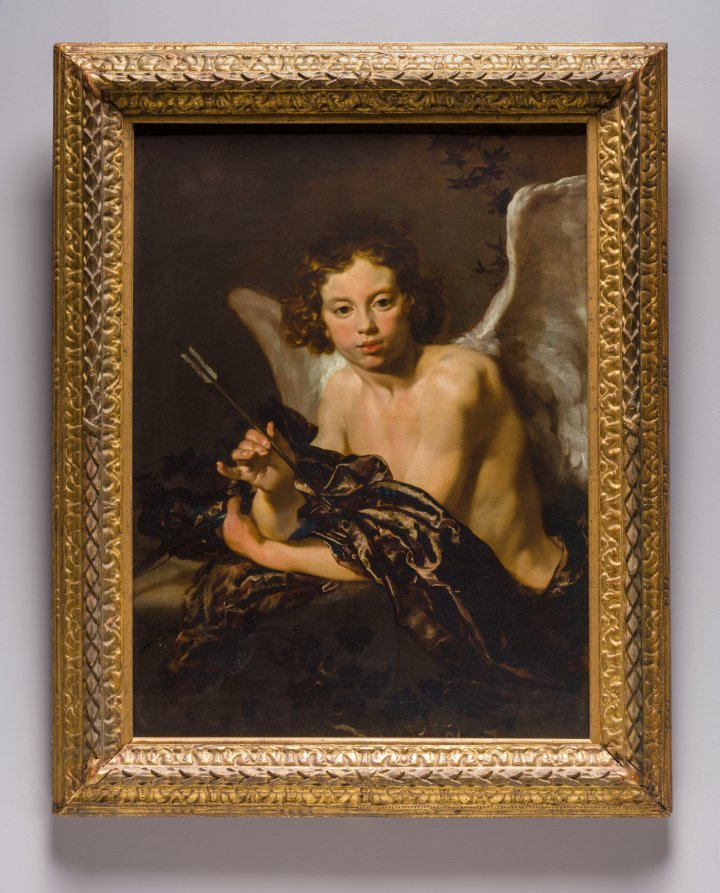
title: Cupid (Amor)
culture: Germany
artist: Johann Liss (German, c. 1597–1631)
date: c. 1630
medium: oil on canvas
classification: Painting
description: Johann Liss studied in Holland and Antwerp, and later (about 1620) traveled to Rome and Venice. His painting of Cupid—also known as Amor, the god of love—displays rich colors and fluid brushwork that were influenced by past Venetian masters (Titian, Tintoretto, or Veronese), while the deep contrasts of light and shadow reveal a stylistic debt to Caravaggio. The directness of Cupid’s gaze and the concentrated energy of his pose create a strong connection with the viewer.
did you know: Liss skillfully combined Dutch, Flemish, and Italian styles to create his own distinct manner.